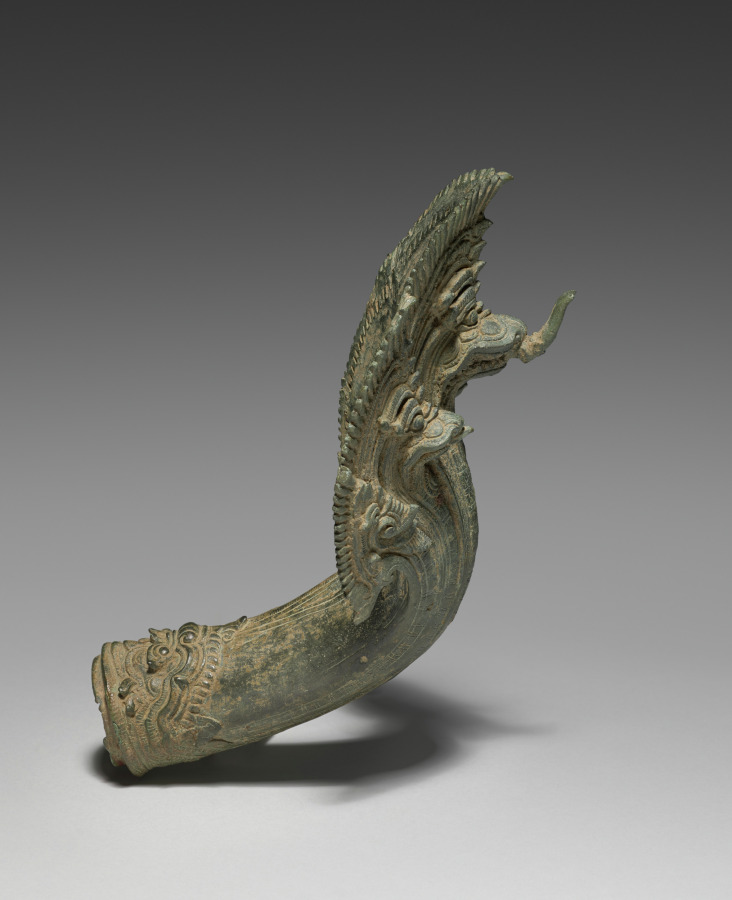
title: Naga Finial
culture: Cambodia, Angkor Wat period, 1100s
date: 1100s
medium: bronze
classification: Metalwork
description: When members of the royal family or priesthood traveled in a public festival procession or to a temple to make offerings or participate in a ceremony, they would be carried in a palanquin, or a covered litter. Portable objects of veneration, such as bronze images or a sacred fire, were also carried on palanquins. The palanquins had wooden poles, hanging seats or raised platforms, and bronze fittings cast in intricate forms and gilt, lending the palanquins a sumptuous quality. The royal palanquins were typically fitted with multiheaded, serpent-shaped finials at the ends of the poles and corners of the elevated platforms. Naga means serpent in Sanskrit, a language from India selectively appropriated by the Khmer in Cambodia. In their own indigenous mythology, the Khmer people trace their descent from a naga princess and a prince from the island of Java who journeyed to Cambodia. The naga remains a potent emblem for the Khmer nation to this day; it is ubiquitous on Cambodian monuments.